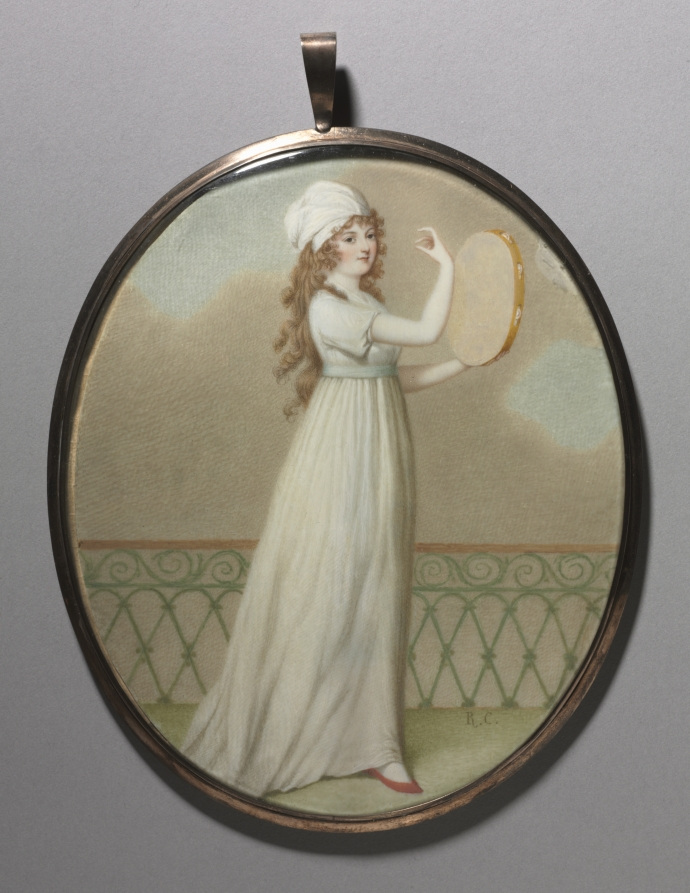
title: Woman with a Tambourine, in Neoclassical Costume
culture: England, 19th century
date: mid to late 19th century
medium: watercolor on ivory in a gold frame with blue glazed reverse and reserve with plaited hair and initials in gold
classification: Portrait Miniature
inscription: annotated lower right: R.C. [initialed on back: JCSB]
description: This large miniature depicts a woman at full length, turned to the left, playing a tambourine held in her left hand. She wears a floor-length, white, Empire-waist gown with short sleeves and scarlet slippers. The Empire silhouette was fashionable in the years around 1800, when it was executed in fine, white cotton or muslin and meant to recall classical Greek or Roman dress. The woman’s light brown hair falls below her waist in curls, and she wears a white turban. She stands on a pale green, closely cropped lawn in front of a low, green, wrought-iron fence with a wood railing. At over 15 centimeters high in its frame, this miniature’s size is incongruous with its oval shape and elaborate glass and braided hair setting, which were typical of late-eighteenth- and early-nineteenth century wearable miniatures a third or quarter of this size. The woman’s face lacks specificity and is probably not a portrait of a particular individual but, rather, a fancy picture exploring themes of beauty and music. This assertion does, however, call into question the presence of the initials and hair on the back of the setting, which customarily indicate an intimate relationship between the owner and the sitter that presumably would be absent outside of portraiture. When this work entered the collection in 1926, it was believed to date from the late eighteenth century, but its size, shape, and the full-length figure make such an early date extremely unlikely. The signature “R. C.” may suggest Richard Cosway (1742–1821), the highly sought-after eighteenth- and nineteenth-century miniaturist; however, this work does not resemble his style. J. H. Wade purchased this object in 1896 for $150—a substantial sum during that period for a miniature—indicating that he may have thought the work was indeed by Cosway. This miniature does relate closely in style and subject matter to the work of the British artist Adam Buck (1759–1833), who was known for his classicizing, full-length watercolor portraits and fancy pictures, after which this work may be a copy. Buck’s miniatures on ivory are bust length and more strongly delineated than this work, which instead recalls the artist’s watercolors. Hallmarks of Buck’s drawings include a low horizon line, muted palette, full-length female figures depicted in profile, and a patchy blue, cloudy sky. A scrolled, wrought-iron fence similar to the one present in this miniature appears in a drawing by Buck. In both cases the fence is used decoratively to break up the expanse of bare space created by the low horizon line and vacant sky. Buck’s works often feature women listening to or playing an instrument, including the tambourine, but he is not known to have painted these full-length figures on ivory. The numerous incompatibilities—including style, subject, composition, medium, setting, size, and signature—together suggest that this object was painted in the second half of the nineteenth century specifically for the art market and to evoke an earlier period.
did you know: On the back the initials JCSB in gold are placed over plaited hair of at least two different colors.